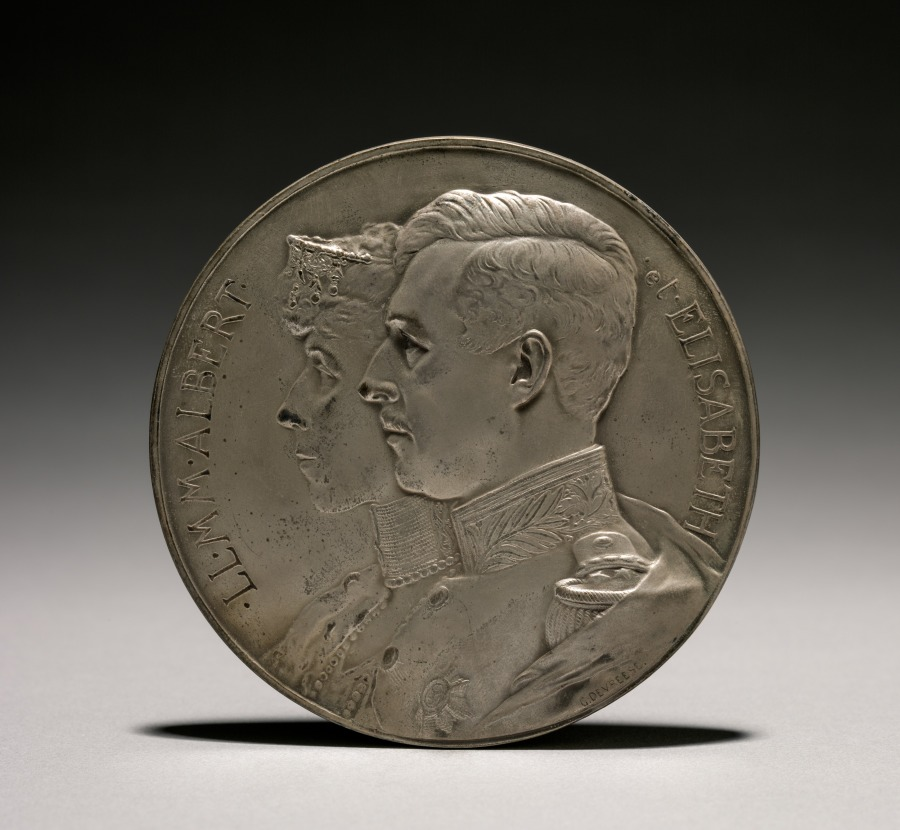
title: Medal (obverse)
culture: Belgium, early 20th century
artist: Godefroid Devreese (Belgian, 1861–1941)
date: 1914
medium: bronze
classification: Metalwork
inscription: "LL.MM.ALBERT et ELISABETH"; signed: "G. Debreese."